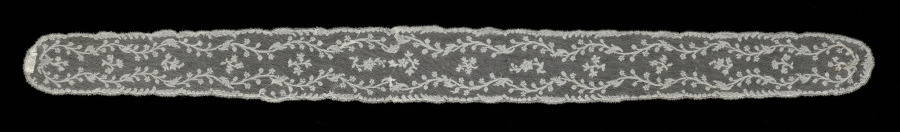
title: Lace Lappet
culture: France, Valenciennes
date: 1700s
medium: Linen: bobbin Lace (Valenciennes)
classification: Lace